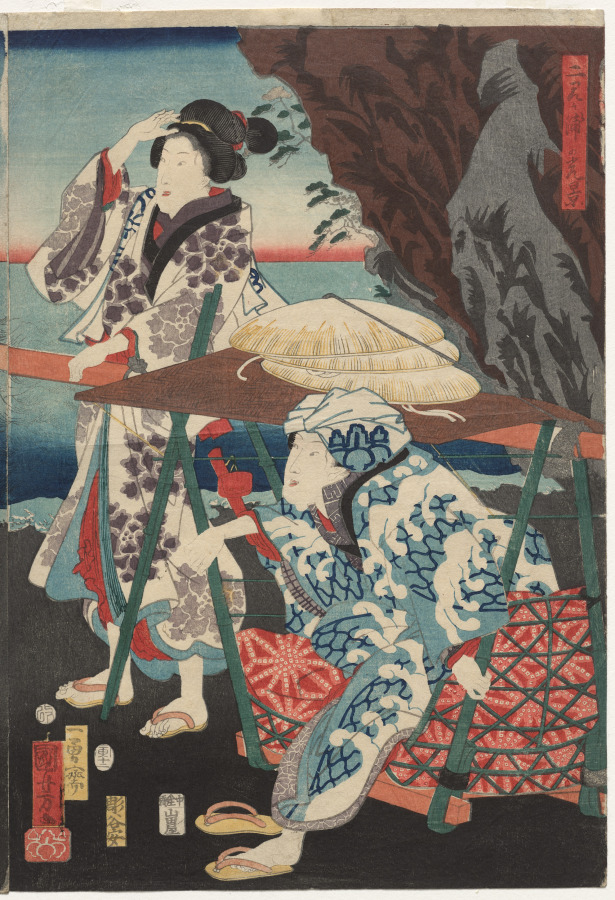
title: Splendid View at Futamigaura Bay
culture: Japan, Edo period (1615–1868)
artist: Utagawa Kuniyoshi (Japanese, 1797–1861)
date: 1854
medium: Right print from a triptych of color woodblock prints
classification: Print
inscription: Signature: Ichiyusai Kuniyoshi ga. Artist Seal: Paulownia. Publisher: Yamadaya Shohei (Nakabashi, emblem). Engraver: Hori Taniyasu. Censorship Seal: aratame.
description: This is one of three prints forming a continuous scene of figures visiting Futamigaura Bay near Ise Grand Shrine, one of Japan’s most sacred places. In the background, the sun rises between the “Wedded Rocks” joined by a twisted rope, called a shimenawa, used to designate a sanctified space. The rocks mark the entrance to Futami Okitama Shrine and are said to be embodiments of Izanagi and Izanami, the gods who, according to myth, created Japan. Futamigaura was a place where pilgrims purified themselves before visiting Ise and often lodged afterwards.